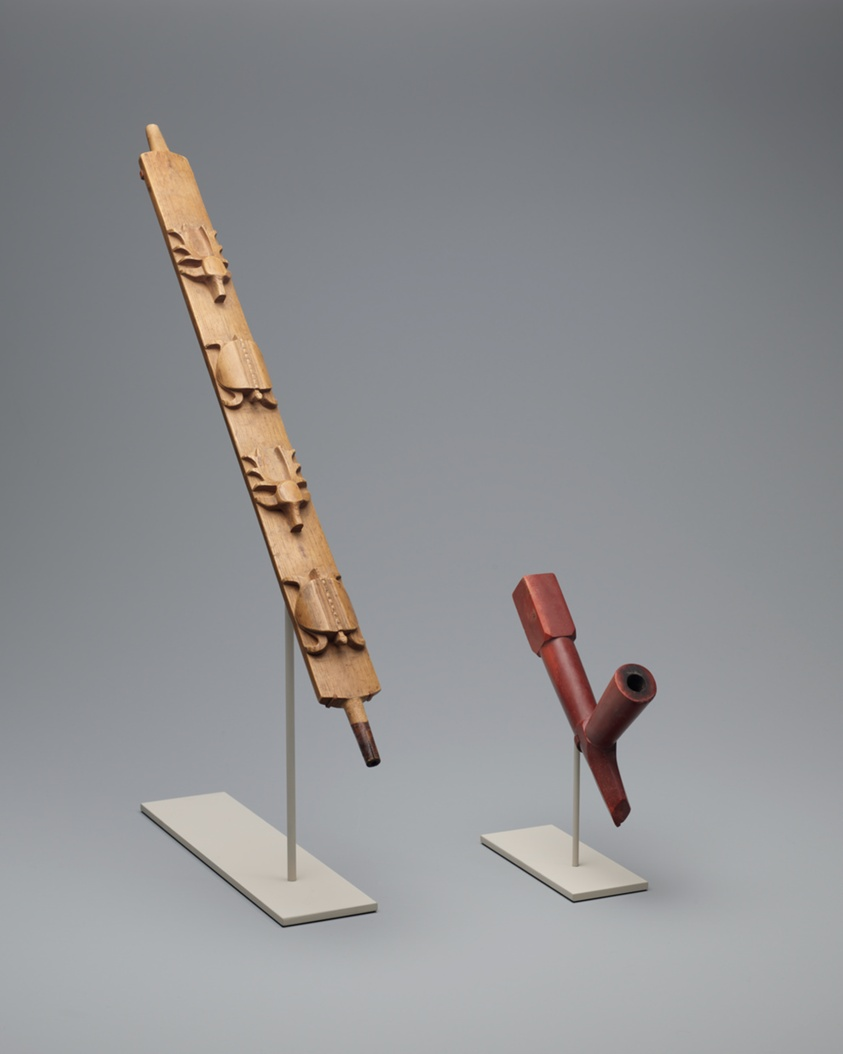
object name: Religious/Ritual Object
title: Pipe Bowl and Effigy Stem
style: cheyenne, plains indian, native american, americas, native north american, Arts of the Americas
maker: Artist unknown (Southern Cheyenne, Tsistsistas); Central or Northern Plains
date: 1880–90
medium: Wood and catlinite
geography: Central Plains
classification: pipe; art of the americas; ritual objects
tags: deer, pipe, stem, turtle